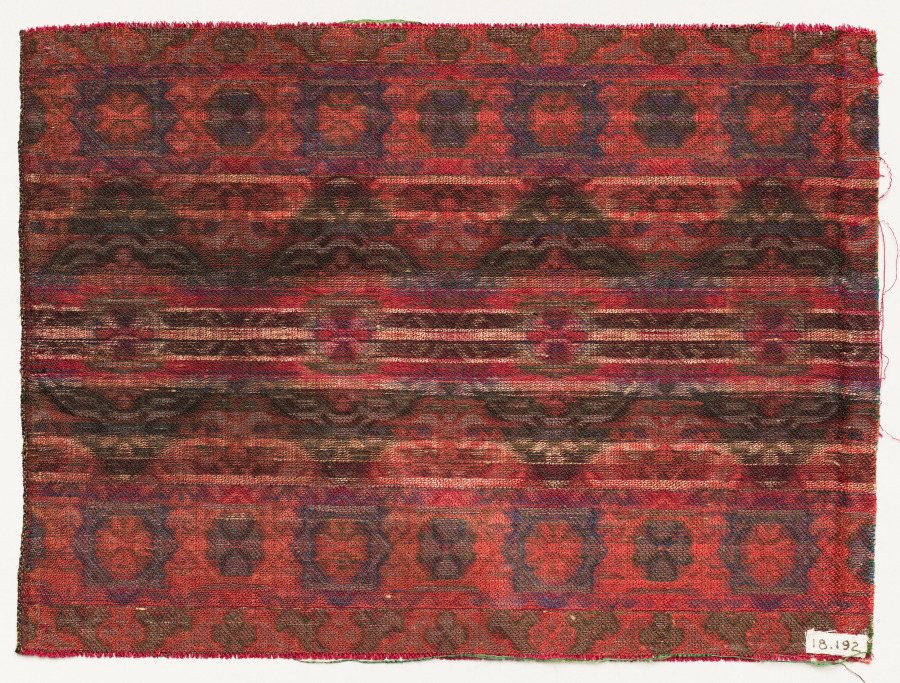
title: Fragment of a belt (hizam)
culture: Africa, North Africa, Morocco, Moroccan weaver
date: 1800s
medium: Silk, dye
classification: Textile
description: This silk textile with a lampas weave features alternating designs of eight-pointed stars, ogival (curved) medallions, and floral patterns. This fragment would have likely once been part of a wider belt, called hizam, worn by elite Moroccan women over their gowns.